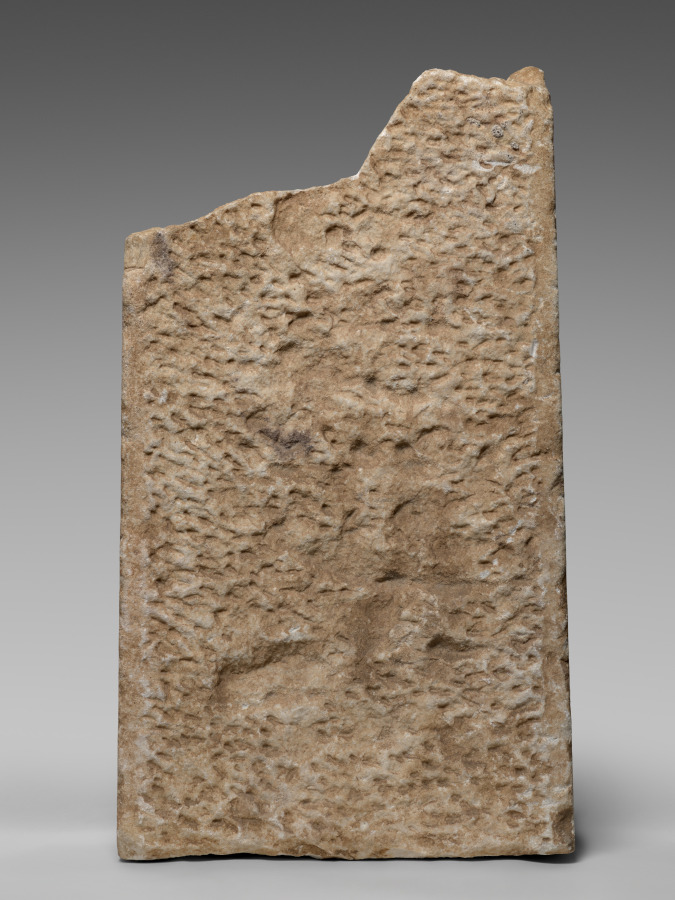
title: Grave Stele (Relief)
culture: Southern Anatolia, Pamphylia, Hellenistic Greek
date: c. 50 BCE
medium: marble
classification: Sculpture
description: The multiple figures, inscription, use of perspective, and architectural frame distinguish this ambitious relief as one of the most important of its type. The Greek inscription on the base reads, “To Sbardia, also named Tate, Eumelos, son of Aphrodisios, her father, [set this up].” The deceased is shown seated on an elaborate chair. A servant girl holding a fan suggests Sbardia’s high social standing. At the bottom right corner, a hen perches on an upturned basket, a symbol of “the good life.” The stele incorporates a “springing” gable supported by engaged half columns with simplified Corinthian capitals. Other features relate to beliefs about mortality and the afterlife. Above and to the left of her chair is her winged psyche (soul) shown leaving her body. Figures of the three fates are shown in the pediment above, reminding us that human life is finite.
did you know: The seated woman is depicted larger to visually emphasize her importance; her servant is in the background.